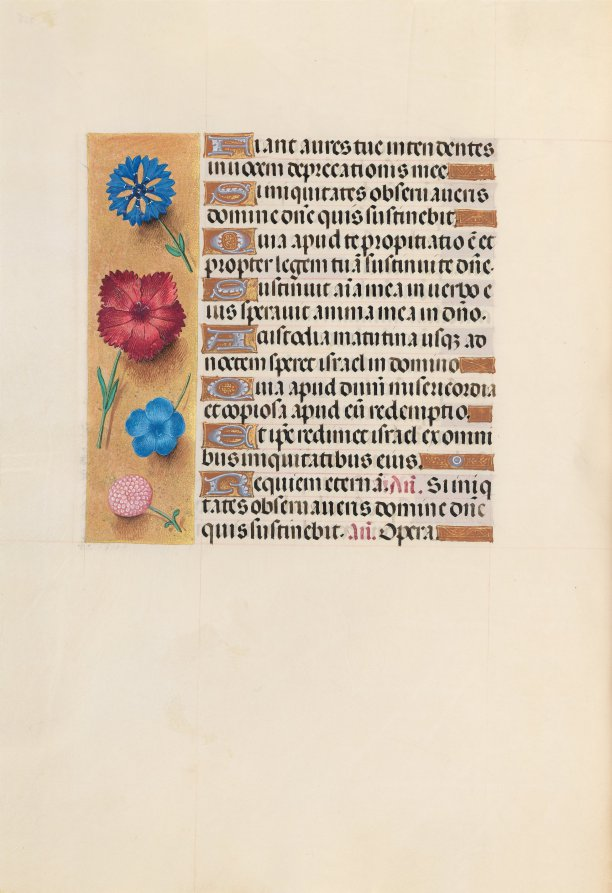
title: Hours of Queen Isabella the Catholic, Queen of Spain: Fol. 222v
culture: Flanders, Ghent and Bruges, late 15th century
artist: Master of the First Prayerbook of Maximillian (Flemish, c. 1444–1519)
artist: and Associates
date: c. 1500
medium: ink, tempera, and gold on vellum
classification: Bound Volume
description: This manuscript was illuminated by a circle of at least five highly organized manuscript painters active in the Flemish cities of Ghent and Bruges. The principal illuminator was Alexander Bening, who painted the majority of the book's miniatures. Manuscripts produced by this circle of artists are renowned for the decoration of their borders, which typically feature a rich variety of realistically-painted flowers, birds, and butterflies. This prayer book, called a book of hours, was intended not for a cleric, but for the private devotions of a lay person-in this case, Isabella the Catholic, Queen of Spain (1451-1504). Isabella's coat of arms embellishes the book's frontispiece. It is unlikely that the book was commissioned by the Queen herself; rather, she probably received it as a diplomatic gift from someone courting her patronage, perhaps Cardinal Francisco Jimenez de Cisneros. A Franciscan friar, Jimenez was dependent upon Isabella for his advancement, first to the post of Queen's confessor in 1492, and then to Archbishop of Toledo in 1495.